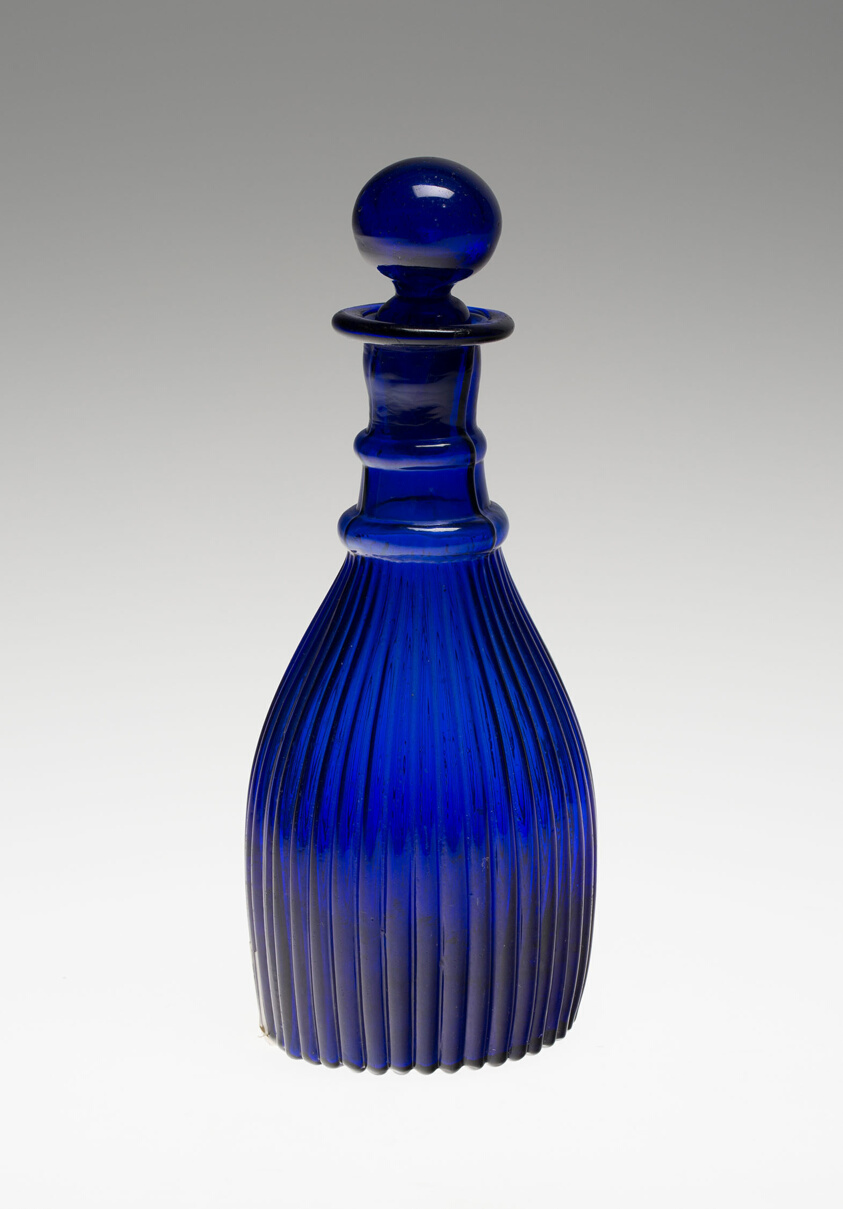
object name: Glass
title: Bitters Bottle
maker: Possibly Europe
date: 19th century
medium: Glass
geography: Europe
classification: glass